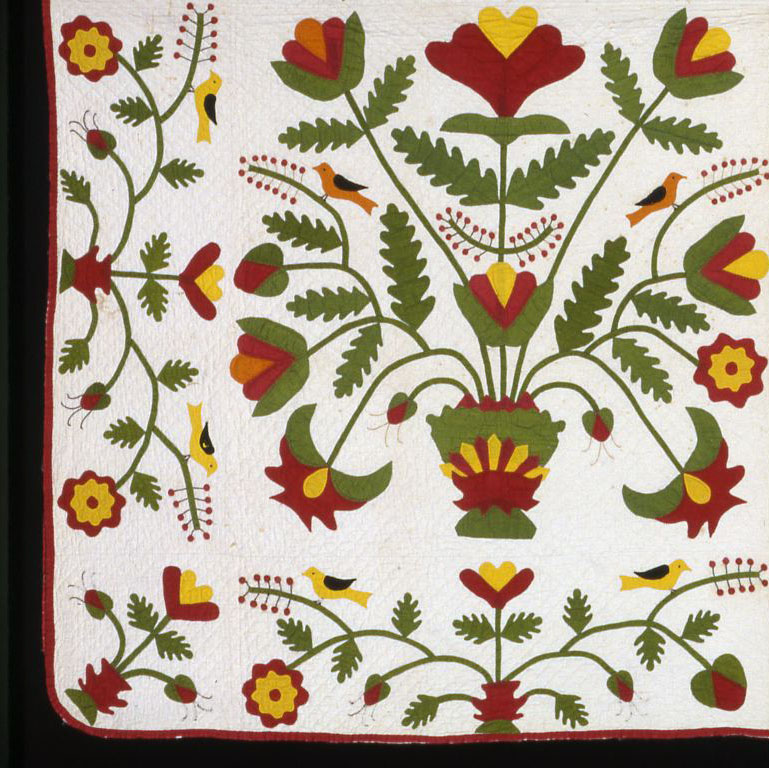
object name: Textile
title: Bedcover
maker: United States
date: 1825/75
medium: Cotton, plain weave; appliquéd with cotton and silk, plain weaves; some padded; embroidered with silk in chain and satin stitches; quilted with cotton thread through cotton batting and cotton, plain weave backing; edged with cotton, plain weave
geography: United States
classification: textile; needlework - quilt; needlework (visual works)